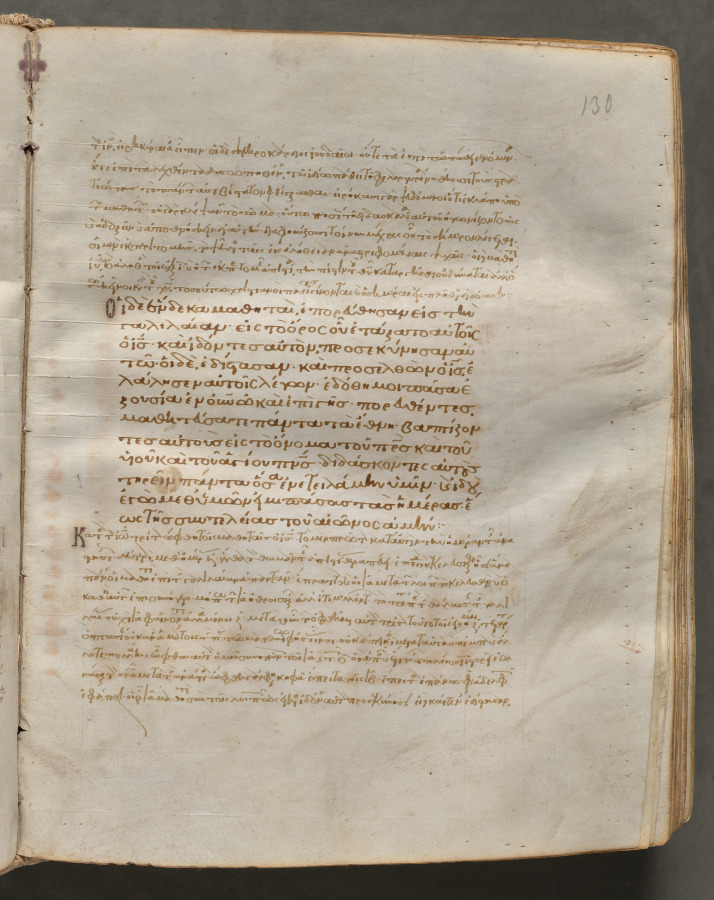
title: Text, folio 130 (recto), from a Gospel Book with Commentaries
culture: Byzantium, Constantinople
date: c. 1000–1100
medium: ink, tempera, and gold on vellum; leather binding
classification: Bound Volume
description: Each of the four gospels in this book opens on a page with brilliantly illuminated borders depicting the author of the text as well as birds-principally peacocks, symbols of the immortality of the soul-and fountains, representing the fountain of life and the salvation of the soul. This volume consists of 428 leaves with texts in Greek. Its level of sophistication suggests that it was probably written and decorated in a monastery in Constantinople.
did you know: Gospel Books were carried in procession through Byzantine churches.